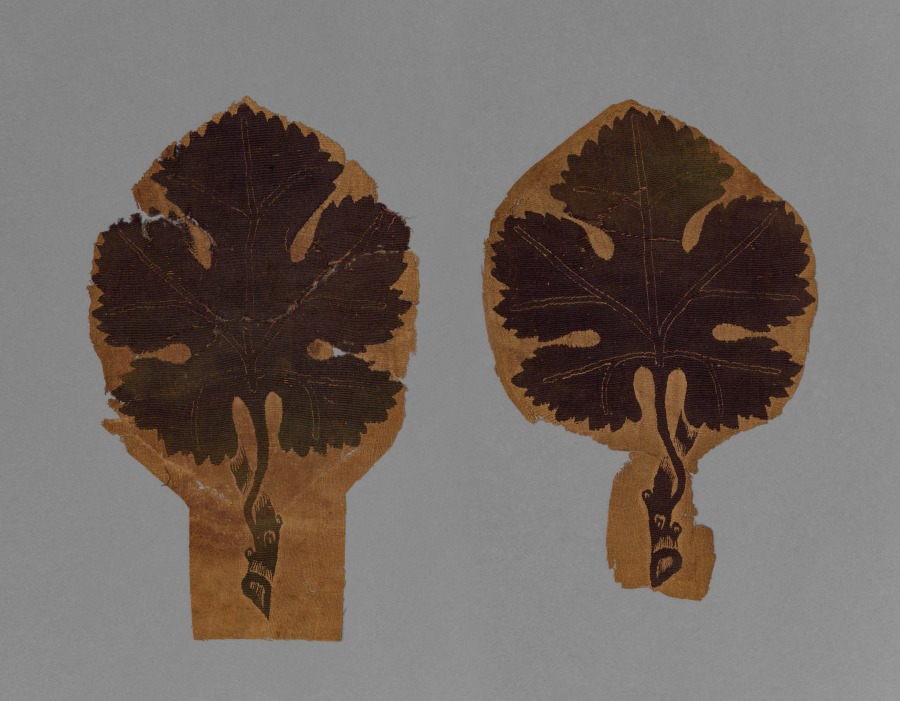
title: Grape Leaves from a Curtain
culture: Egypt, Byzantine period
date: 400s-500s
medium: weft-faced plain weave with tapestry weave and supplementary weft wrapping; undyed linen and dyed wool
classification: Textile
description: This deep-purple grape leaf once decorated the plain linen ground of a curtain. It probably refers to Dionysus, the classical god of wine, whose cult was popular in Egypt through the 6th century.